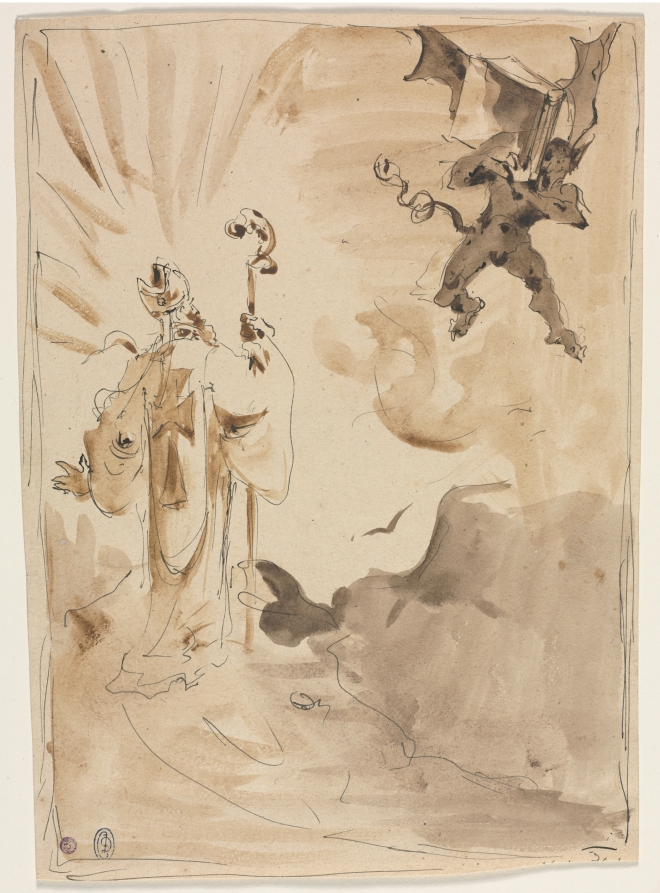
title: The Bishop and the Demon (recto)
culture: Italy, 20th century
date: 1900s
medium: pen and black ink and brush and brown wash (two different colors brown wash)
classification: Drawing